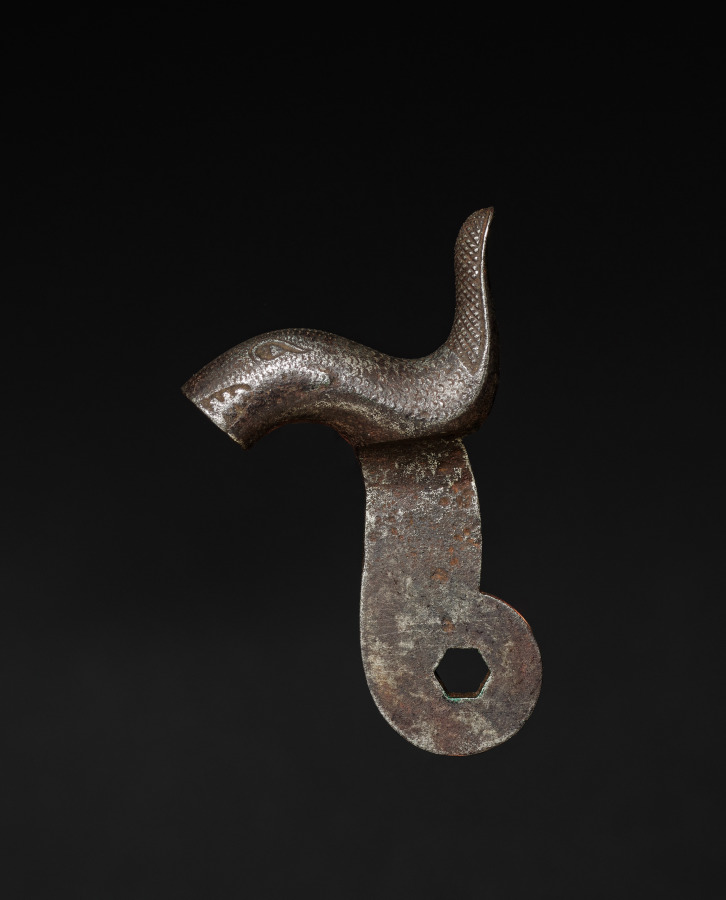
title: Gun-Lock Hammer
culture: England, early 19th century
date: c. 1800–1825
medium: steel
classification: Arms and Armor